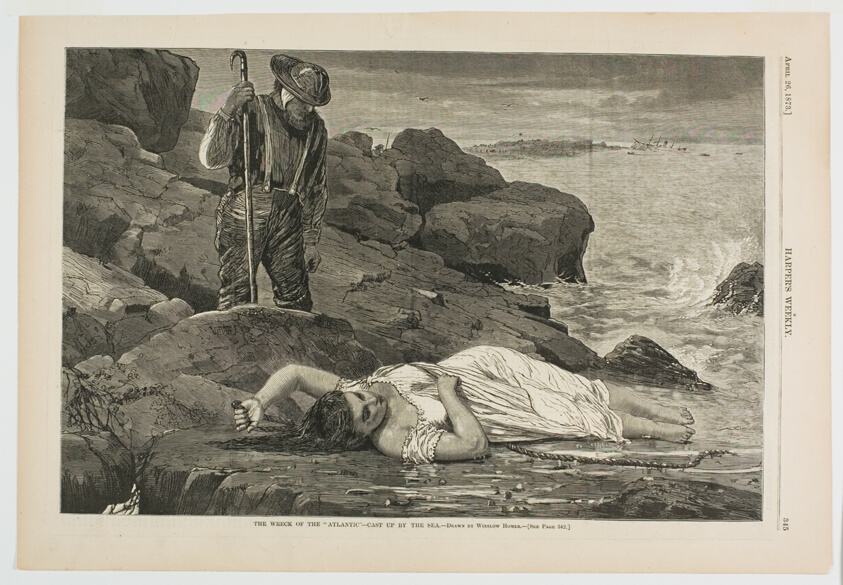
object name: Print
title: The Wreck of the "Atlantic"—Cast Up by the Sea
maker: Winslow Homer (American, 1836-1910); published by Harper's Weekly (American, 1857-1916)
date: published April 26, 1873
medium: Wood engraving on paper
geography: United States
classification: wood engraving; print; prints and drawing